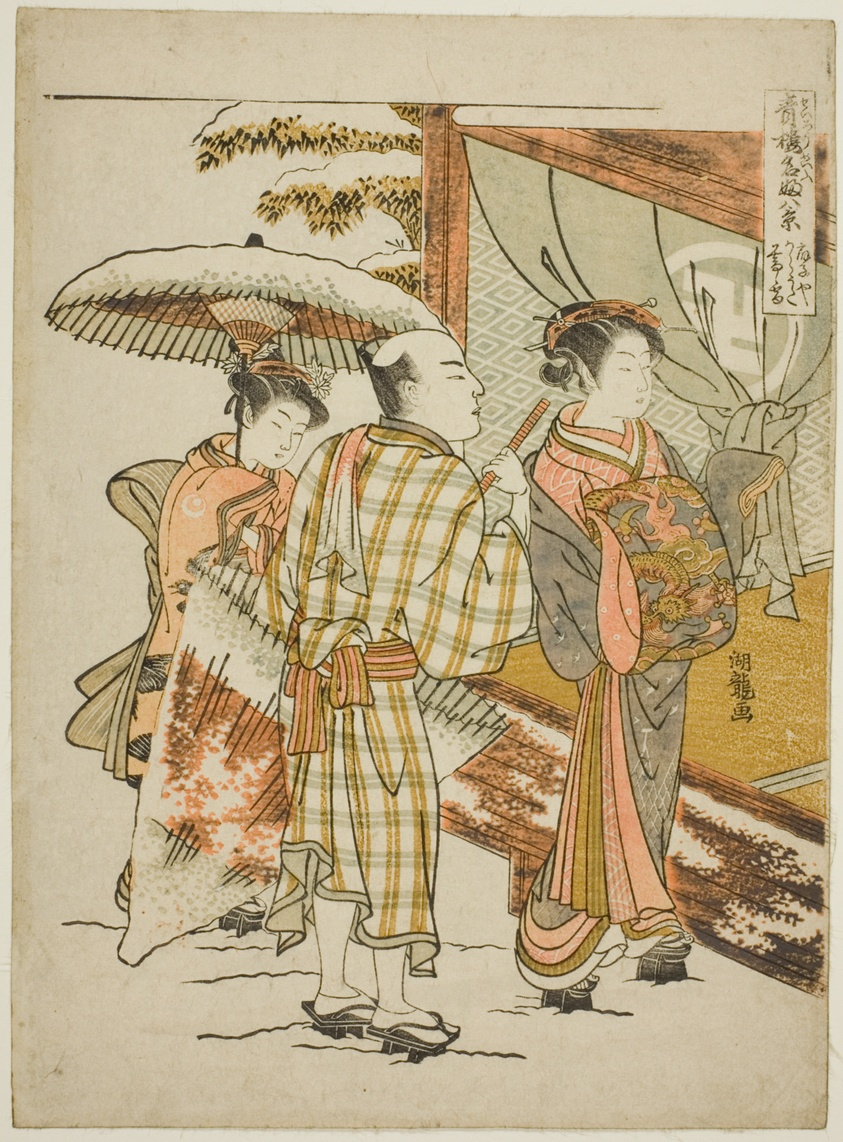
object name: Print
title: Karauta of the Ogiya in Evening Snow (Ogiya Karauta bosetsu), from the series "Eight Views of Famous Beauties of the Pleasure Quarters (Seiro meifu hakkei)"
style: Japanese (culture or style)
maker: Isoda Koryusai (Japanese, 1735-1790)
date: c. 1773/75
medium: Color woodblock print; chuban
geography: Japan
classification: woodblock print; print; asian art